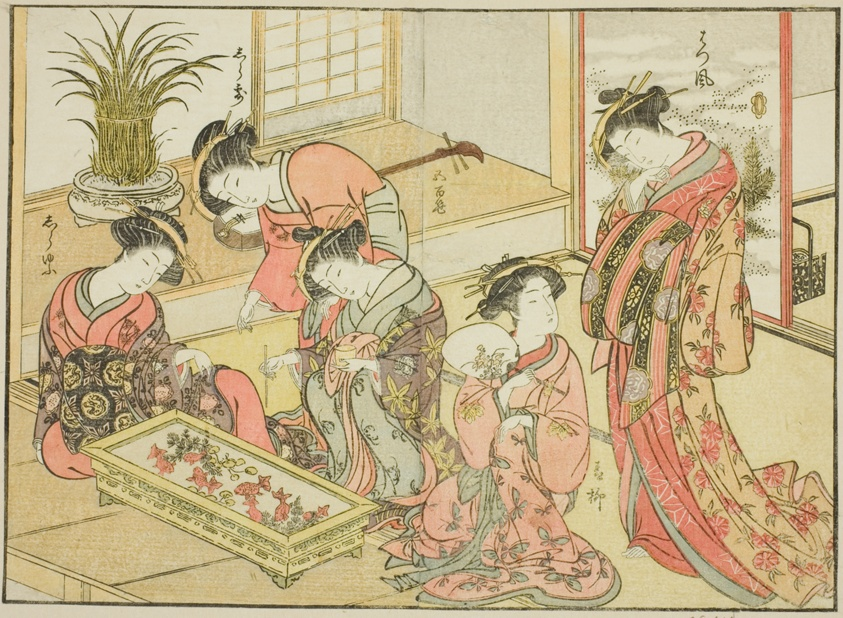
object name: Print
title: Courtesans of the Wakanaya, from the book "Mirror of Beautiful Women of the Pleasure Quarters (Seiro bijin awase sugata kagami)," vol. 1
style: Japanese (culture or style)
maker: Katsukawa Shunsho; Japanese, 1726-1792; Kitao Shigemasa; Japanese, 1739-1820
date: 1776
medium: Color woodblock print; double-page illustration cut from a book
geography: Japan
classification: woodblock print; print; asian art